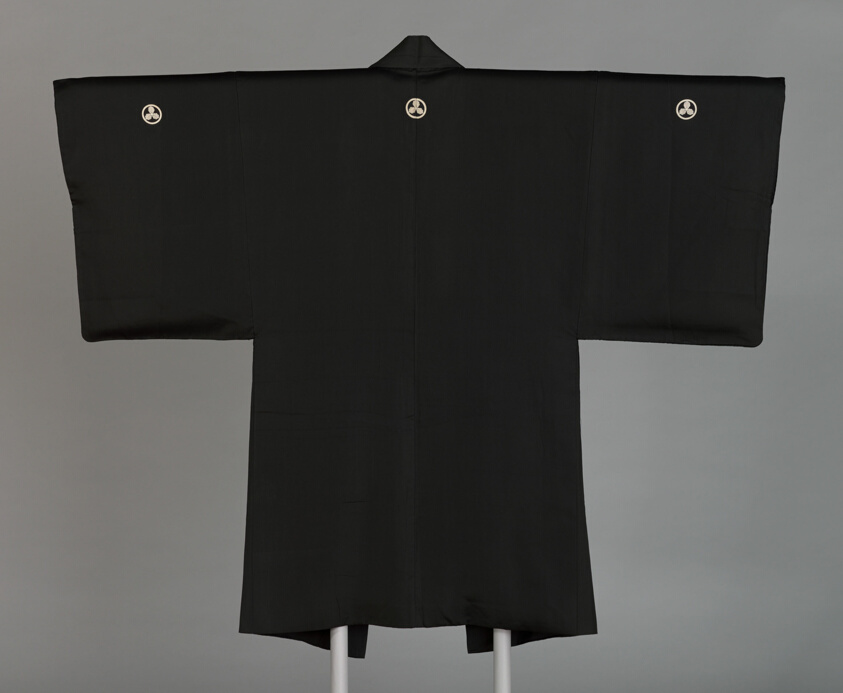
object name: Costume and Accessories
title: Man's Haori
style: late edo, asian, Japanism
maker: Japan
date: late Edo period (1789–1868)/ Meiji period (1868–1912), 19th century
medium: Silk, plain weave; resist dyed; lined with silk, plain weave; resist dyed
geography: Japan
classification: textile; weaving - printed; costume